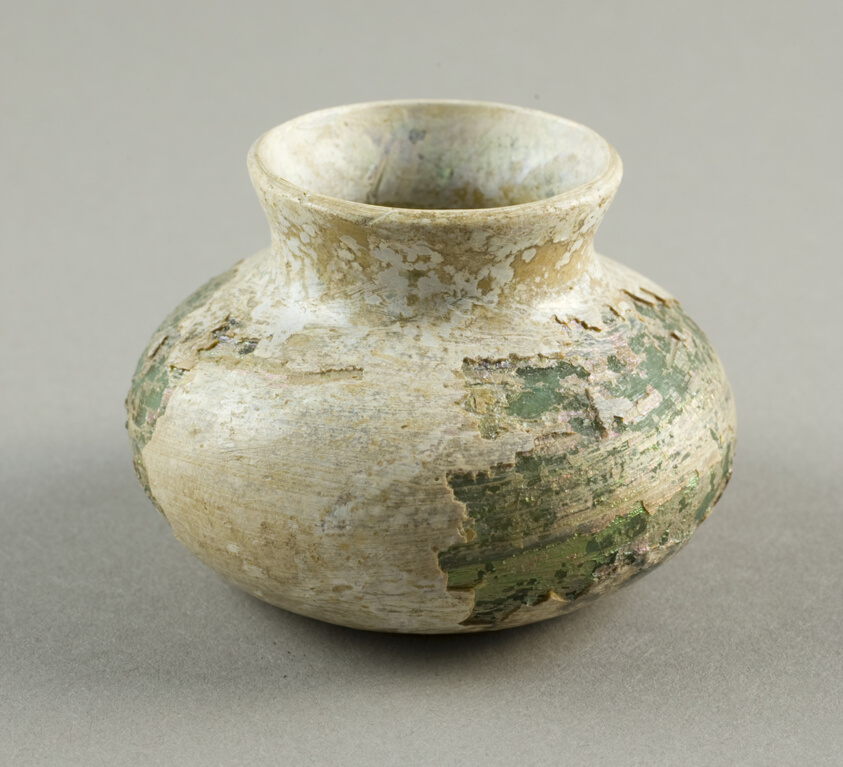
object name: Vessel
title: Jar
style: syrian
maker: Islamic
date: 7th-12th century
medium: Glass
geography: Syria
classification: glass; vessel; ancient art